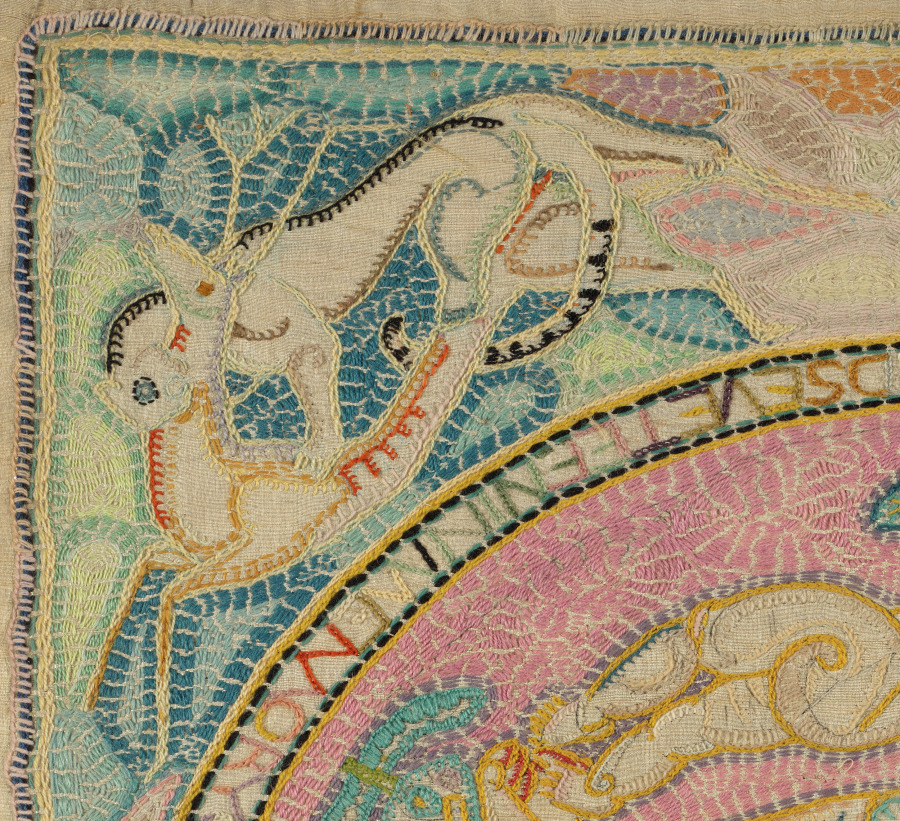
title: The Family (In Memory of a Summer in the White Mountains)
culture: America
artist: Marguerite Zorach (American, 1887–1968)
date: 1917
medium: plain weave silk; wool embroidery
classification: Embroidery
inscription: THE FAMILY / DONE BY MARGUERITE ZORACH IN THE YEAR NINETEEN HUNDRED AND SEVENTEEN IN MEMORY OF A SUMMER IN THE WHITE MOUNTAINS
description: Marguerite Zorach conceived her large, complex embroideries as major artistic statements at a time when the medium was routinely considered “craft,” as opposed to “fine art.” In doing so, she helped to erase such distinctions. One of her most acclaimed works, this example celebrates humanity in harmony with nature, presenting the artist, her husband (a Cleveland-raised sculptor named William Zorach), and their son amid an evergreen tree and four pairs of animals. Very time consuming to create, Zorach’s embroideries are rare.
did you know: In 1925, Zorach served as first president of the New York Society of Women Artists, an organization still in existence.